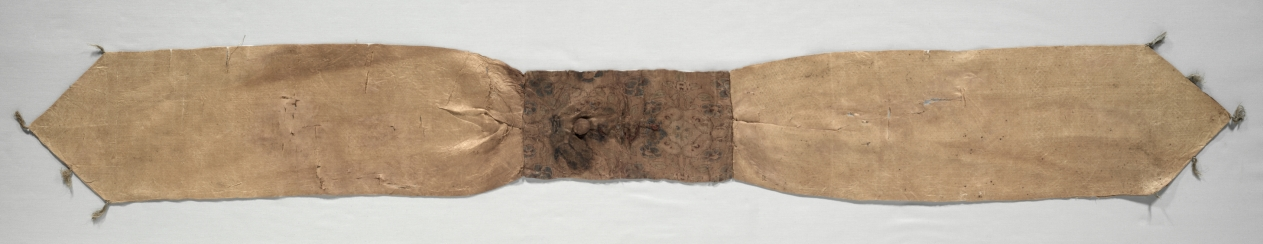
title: Silk Belt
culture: China, Liao dynasty (907-1125)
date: 907–1125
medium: compound twill weave, silk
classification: Textile